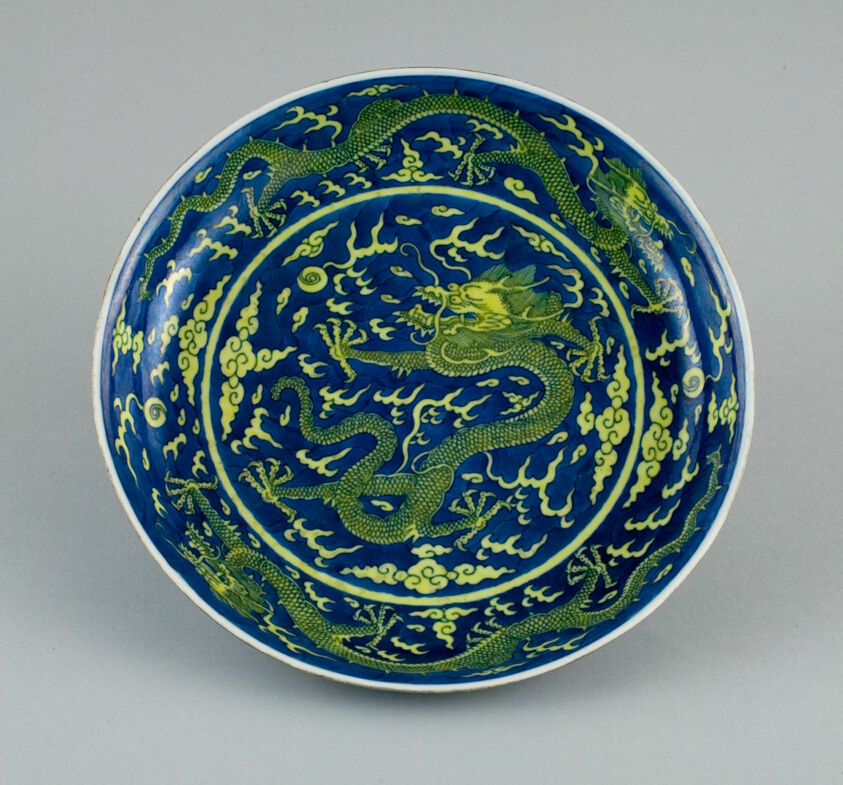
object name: Vessel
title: Dish with Dragons amid Clouds, Chasing Flaming Pearls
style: Chinese (culture or style)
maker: China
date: Qing dynasty (1644–1911), Qianlong reign mark and period (1736–1795)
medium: Porcelain painted in underglaze blue and overglaze yellow enamel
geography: China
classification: dish (vessel); porcelain; asian art; ceramics; vessel